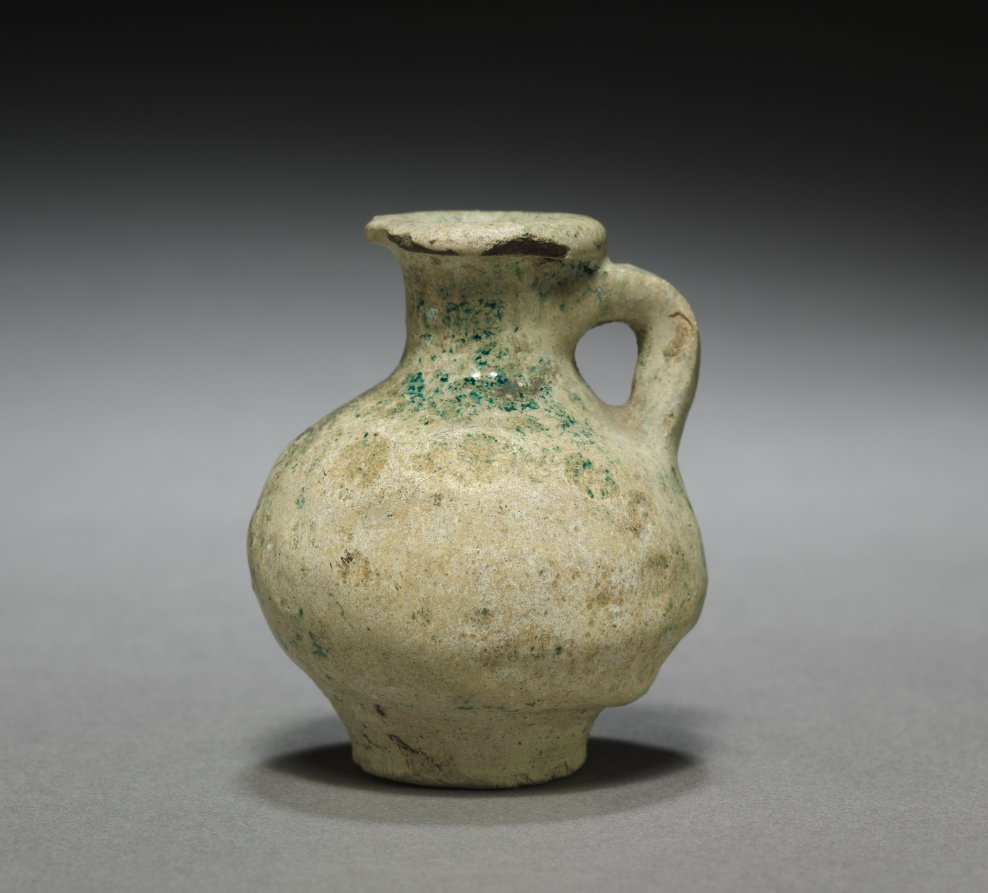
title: Jar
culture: Parthian Empire (247 BCE–224 CE)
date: 1–200 CE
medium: terracotta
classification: Ceramic